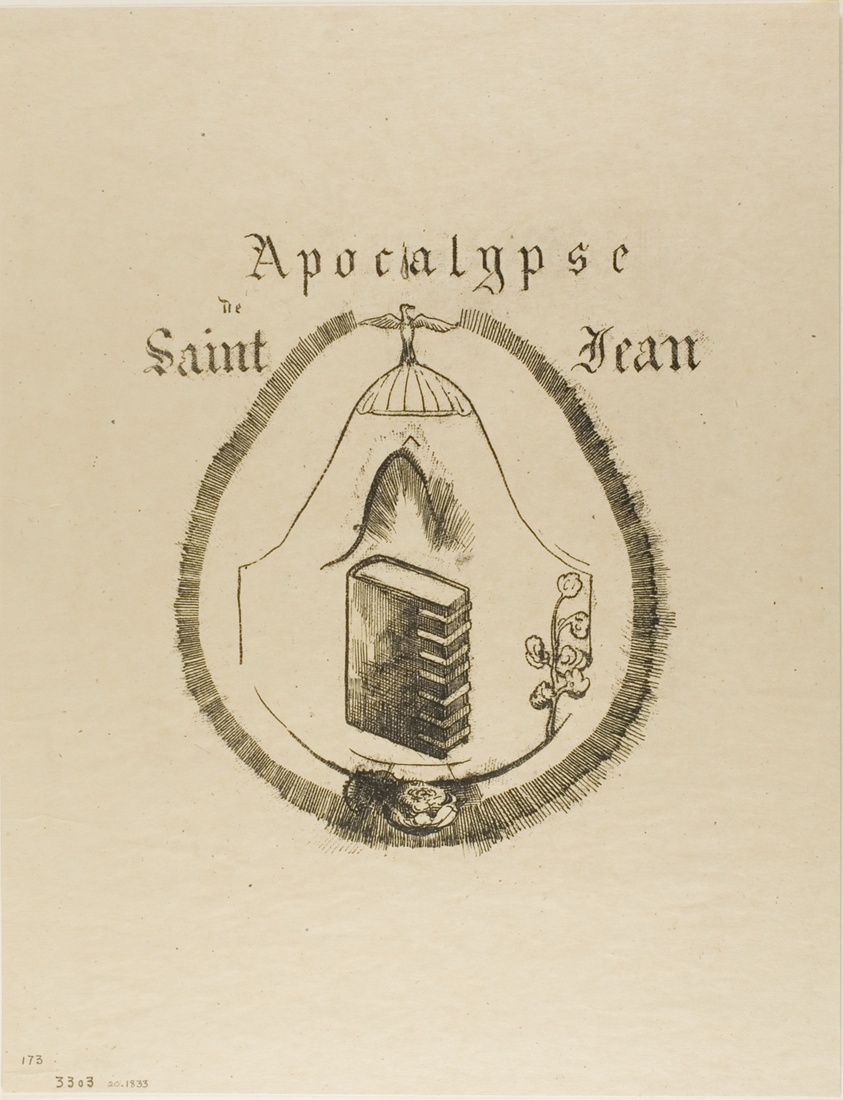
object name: Print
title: Cover-Frontispiece for the Apocalypse of St. John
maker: Odilon Redon (French, 1840-1916)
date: 1899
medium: Lithograph in black on cream Japanese paper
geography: France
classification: lithograph; print; prints and drawing; paper